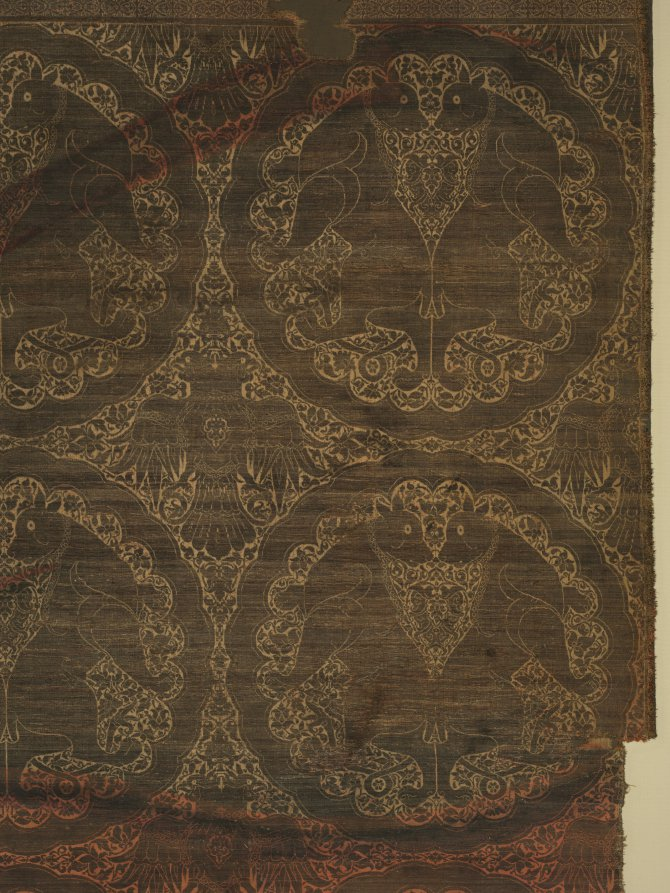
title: Cloth of gold with felines and eagles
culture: Northeast Iran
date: 1225–75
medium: Silk and gold thread: lampas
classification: Textile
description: Mongol taste for luxury was equated with gold, symbol of imperial authority, power, and legitimacy. This splendid cloth of gold-exceptionally large and luxurious-may have enriched the interior of a palace or a majestic tent. The golden pattern, although tarnished on the faded red silk ground, features scalloped medallions with felines whose long tails terminate in dragons’ heads amid elegant floral vines. Double-headed eagles form interstitial motifs on the floral ground. A radiant gold-on-gold band of pseudo-Arabic script enriches the top, woven with gold strips wrapped around a silk core on a ground of flat strips of gold, immediately beneath the pattern testing area.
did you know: Mongol cloths of gold, called nasji, incorporate Iranian, Central Asian, and Chinese features, reflecting the effects of gift exchanges and international commerce.